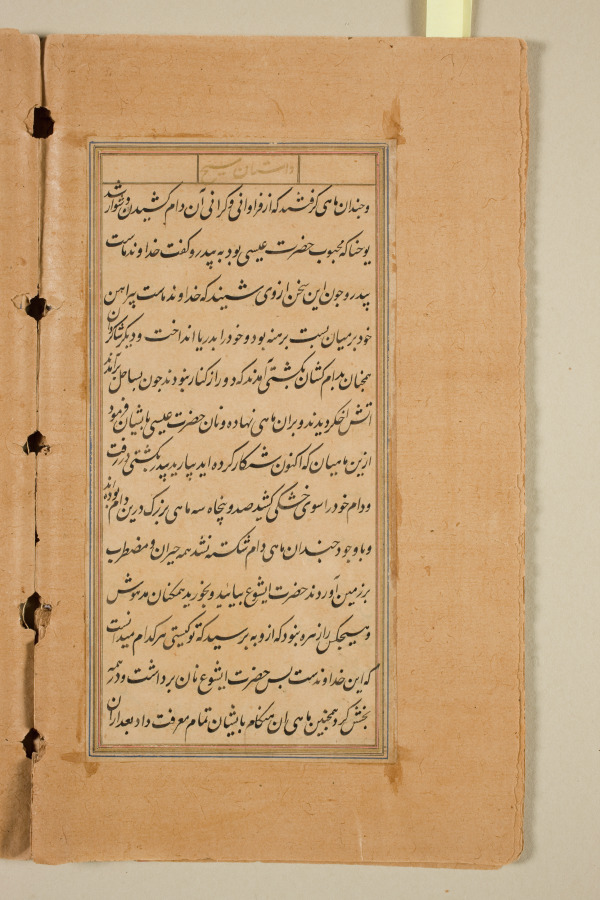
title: Text page from a Mirror of Holiness (Mir’at al-quds) of Father Jerome Xavier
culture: Mughal India, Allahabad, made for Prince Salim (1569–1627)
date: 1602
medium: Ink and gold on paper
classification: Manuscript